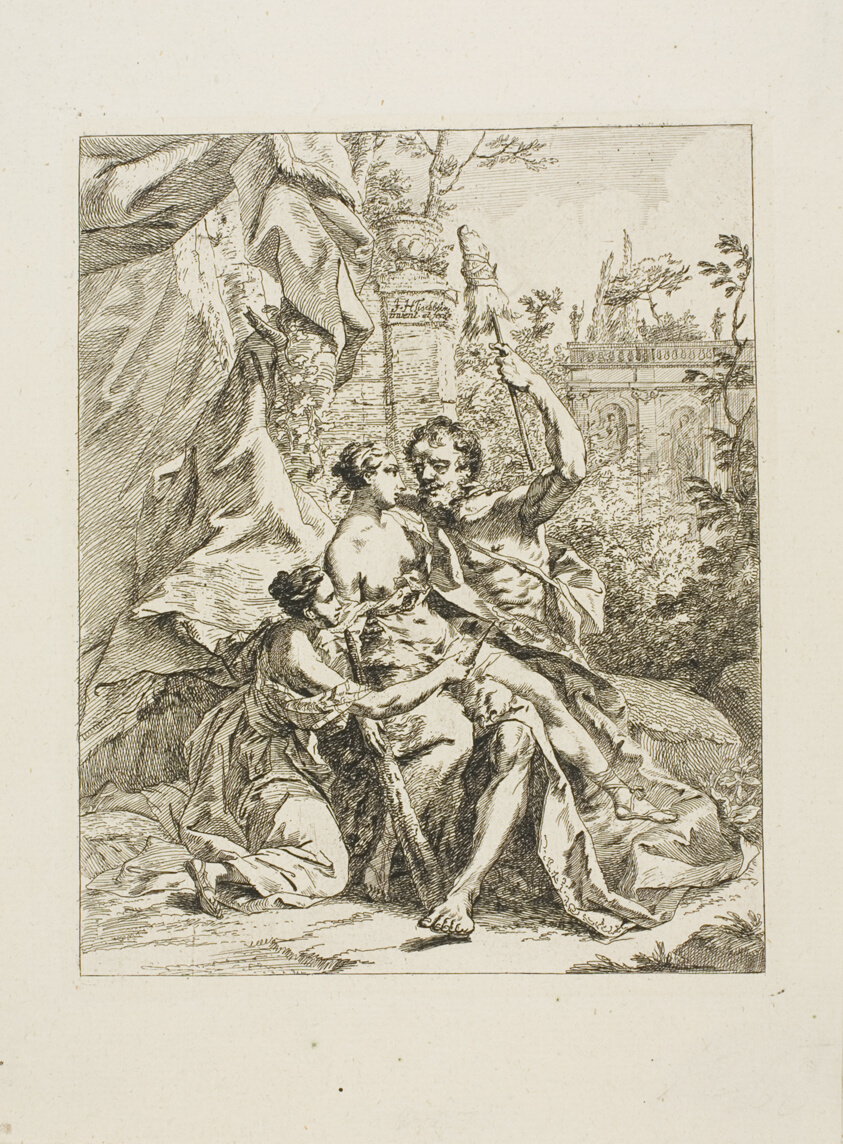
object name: Print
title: Hercules and Omphale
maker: Johannes Tischbein; German, 1722-1789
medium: Etching printed in black on white wove paper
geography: Germany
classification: etching; print; prints and drawing